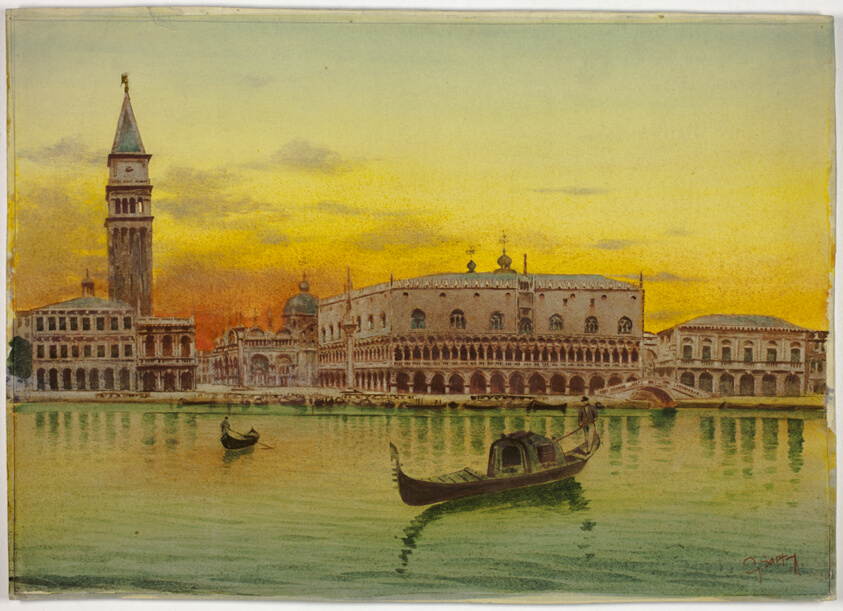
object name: Drawing and Watercolor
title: View of Venice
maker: G. Saetta (Unknown, possibly 19th century)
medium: Watercolor on cream wove paper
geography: Italy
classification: watercolor; drawings (visual works); prints and drawing